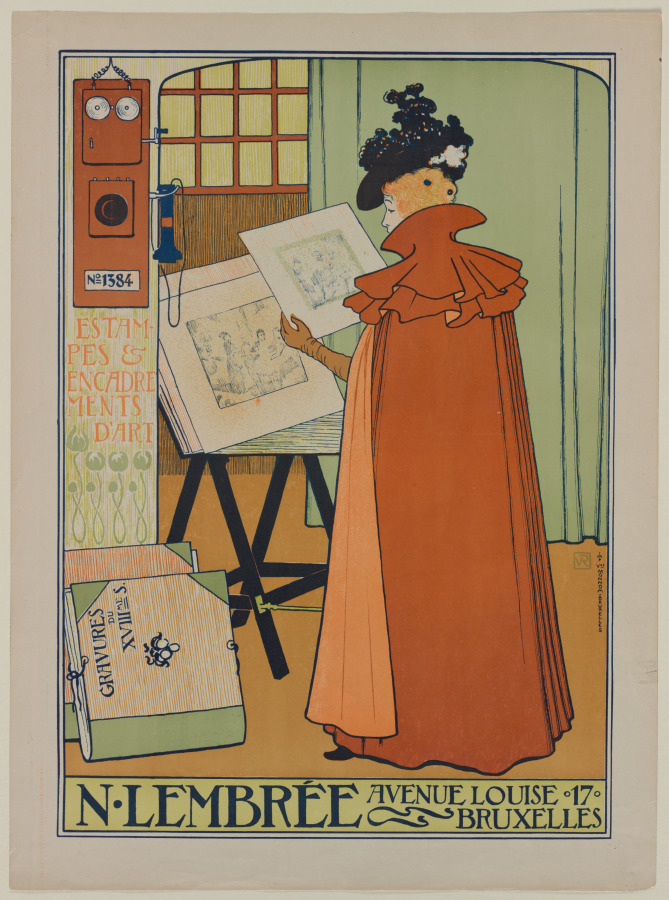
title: Poster for the Lembrée Gallery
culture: Belgium, 19th century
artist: Theo van Rysselberghe (Belgian, 1862–1926)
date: 1897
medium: color lithograph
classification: Print